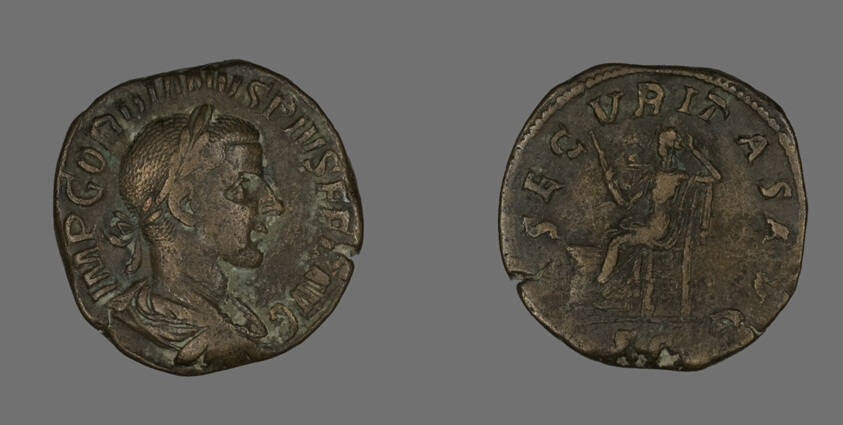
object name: Coin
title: Sestertius (Coin) Portraying Emperor Gordianus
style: roman (ancient, style or period), ancient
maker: Roman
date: 238-244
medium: Bronze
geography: Roman Empire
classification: coin; ancient art